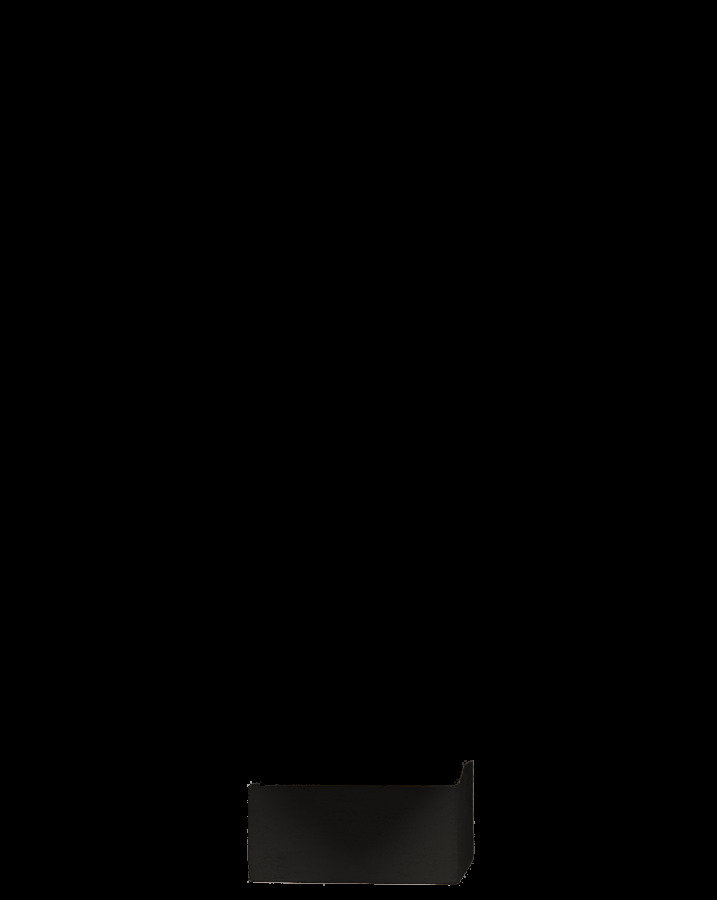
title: Head of Vishnu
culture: Central India, Madhya Pradesh, Vidisha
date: 300s CE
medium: sandstone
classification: Sculpture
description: When complete, this iconic image of the Hindu god Vishnu would have been impressive in scale, approximately life-size. During the Gupta period (c. 319–550 CE), images of Vishnu included a lion head in the center of the crown. The lion communicated royal authority, solar radiance, and the concept of glory. These attributes characterize the power and personality of this deity who ensures the preservation of his creation.